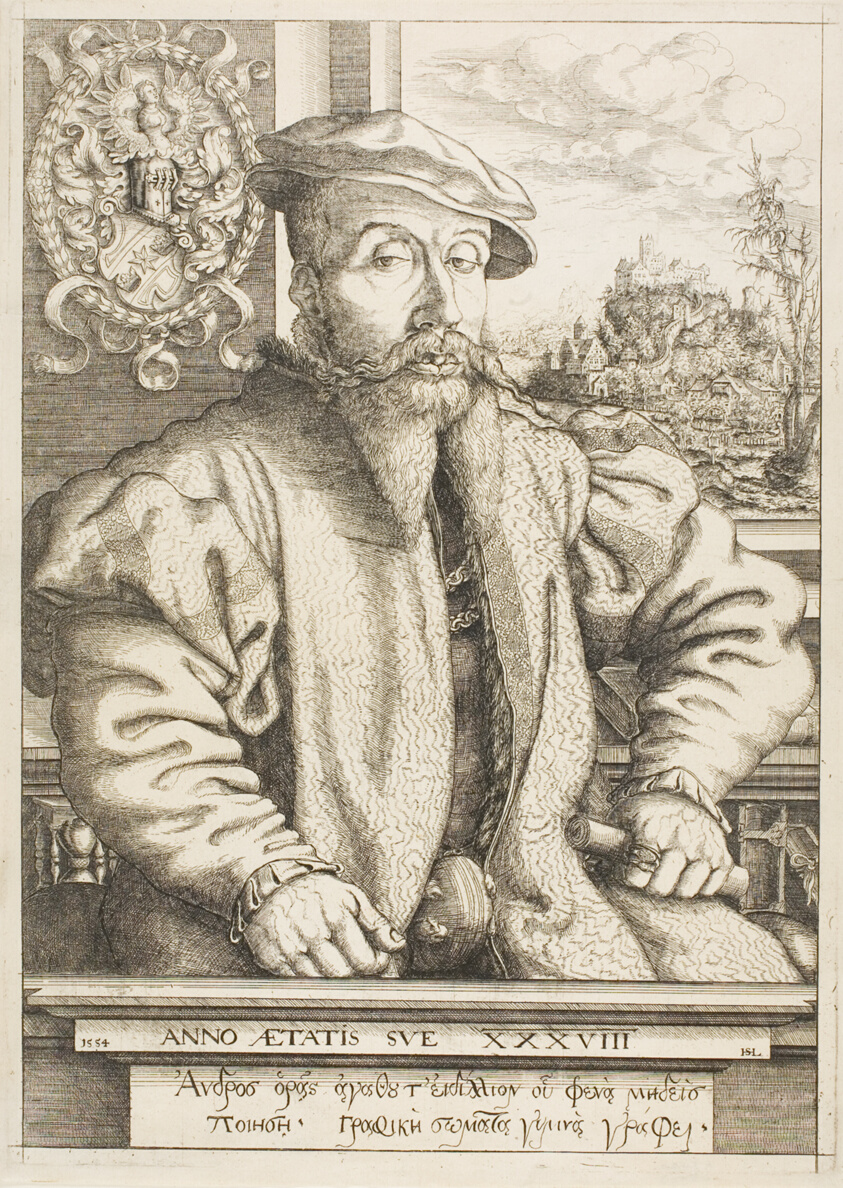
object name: Print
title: Portrait of Georg Roggenbach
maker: Hanns Lautensack (German, 1524-1560/66)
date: 1554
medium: Etching on paper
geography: Germany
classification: etching; print; prints and drawing